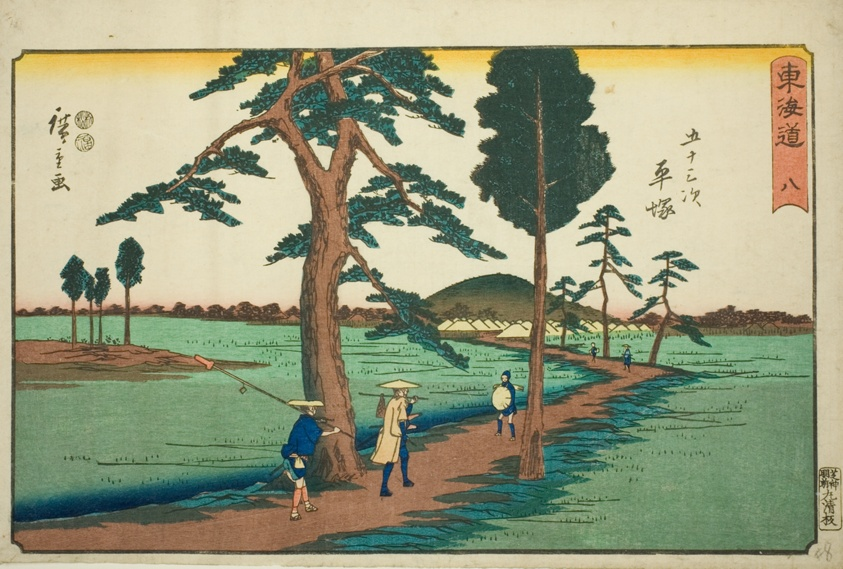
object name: Print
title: Hiratsuka—No. 8, from the series "Fifty-three Stations of the Tokaido (Tokaido gojusan tsugi)," also known as the Reisho Tokaido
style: Japanese (culture or style)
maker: Utagawa Hiroshige 歌川 広重; Japanese, 1797-1858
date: c. 1847/52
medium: Color woodblock print; oban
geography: Japan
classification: woodblock print; print; asian art